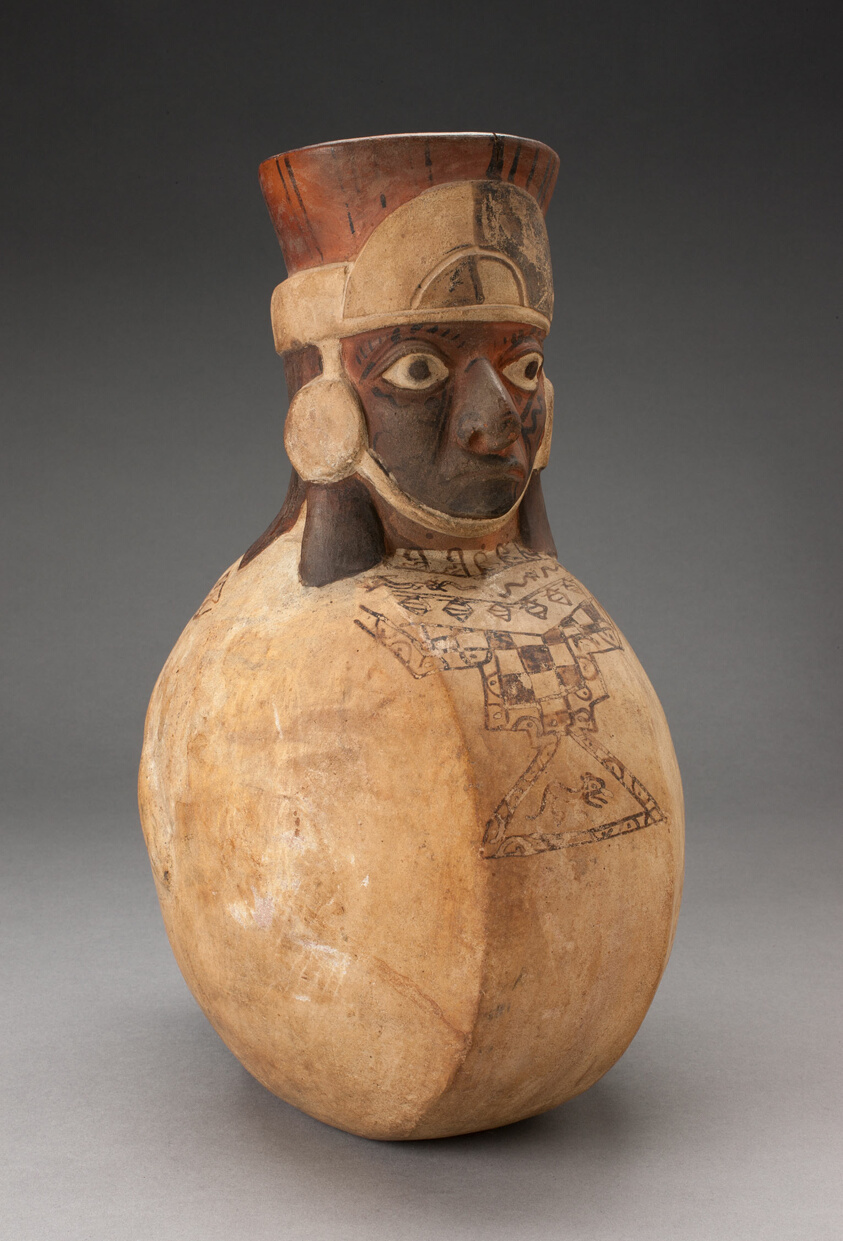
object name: Vessel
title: Anthropomorphic Flat-sided Flask with Molded Head and Painted Textile Tunic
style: moche, mochica, early intermediate period, Pre-Columbian, americas, Arts of the Americas, andean, andes, south american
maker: Moche (North coast, Peru)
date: 100 BCE–500 CE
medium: Ceramic and pigment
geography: Peruvian North Coast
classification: earthenware; art of the americas; ceramics; vessel